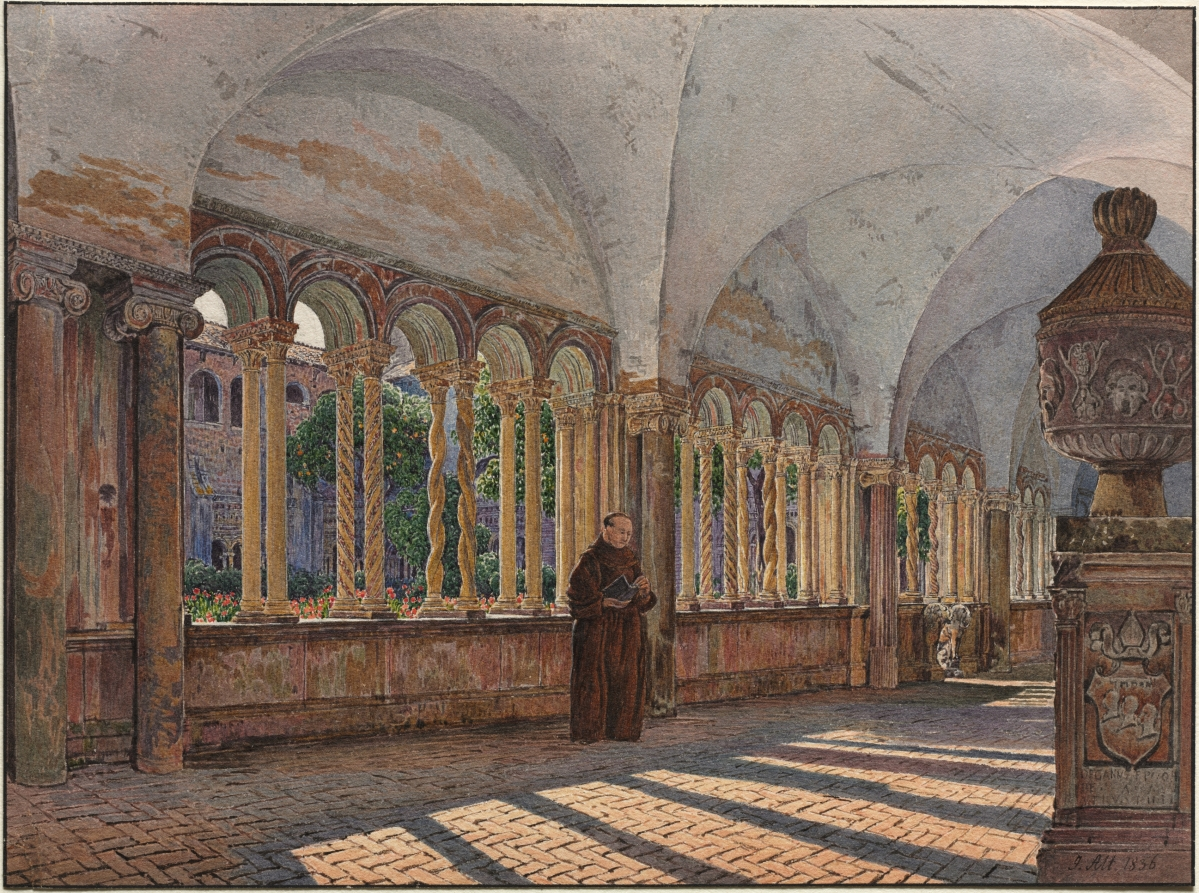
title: View of the Cloister of San Giovanni in Laterano, Rome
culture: Austria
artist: Jakob Alt (Austrian, 1789–1872)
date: 1836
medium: pen and black ink and watercolor over black chalk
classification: Drawing